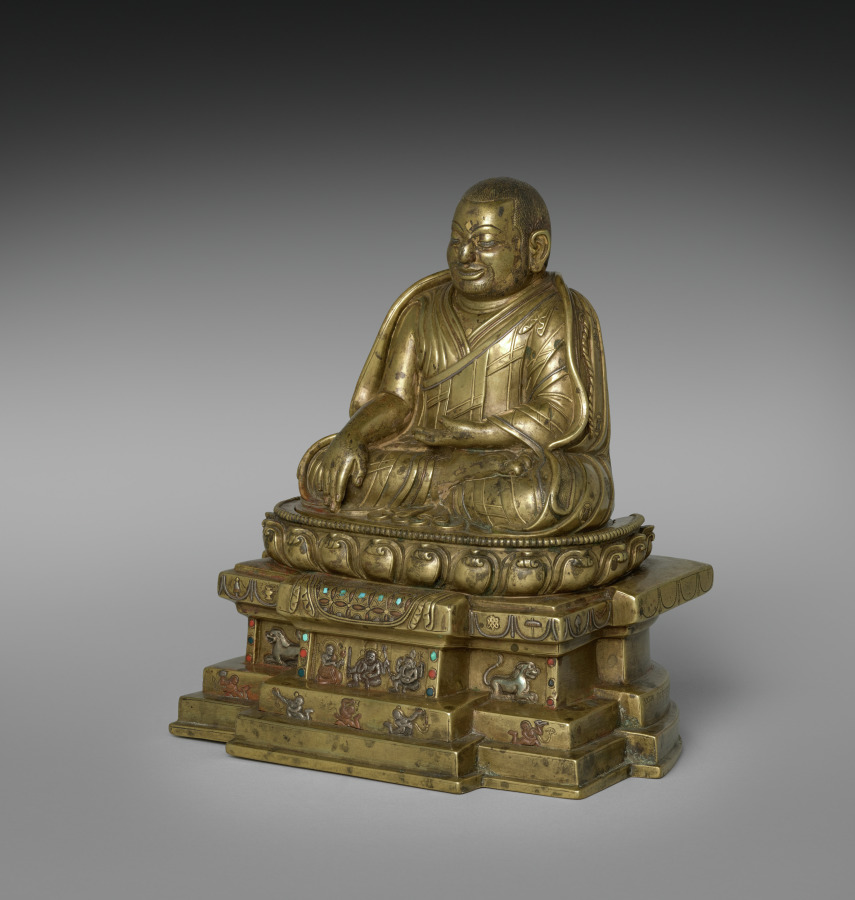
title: Portrait of Phagmo Drupa Dorje Gyalpo (1110–1170)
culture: Central Tibet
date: 1200s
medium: gilt bronze with gold, silver, copper, turquoise, lapis, and coral inlay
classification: Sculpture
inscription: / / Na mo 'ghu ru / / Ngan lam ban chung bdag gis ni / / bla ma Rin chen sku bzhengs pa yi / / bsod nams 'di yi byin brlabs kyis / / 'gro drug sdug sngal zad par shog / / Translation: "Salutations to the master ! May the sufferings of the six kinds of beings be appeased through the blessing of merit gained by me, the little monk of Ngan.lam, in having this statue of the Lama Rin.chen made."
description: This portrait statue depicts the first monastic leader of the prominent Buddhist monastery of Densatil, an influential early leader of the Tibetan Buddhist monastic order called Kagyu, famous for his views on the importance of meditation. He sits on a lotus pedestal and lion throne, like a Buddha, and his hand positions (mudras) communicate that meditation leads to enlightenment.